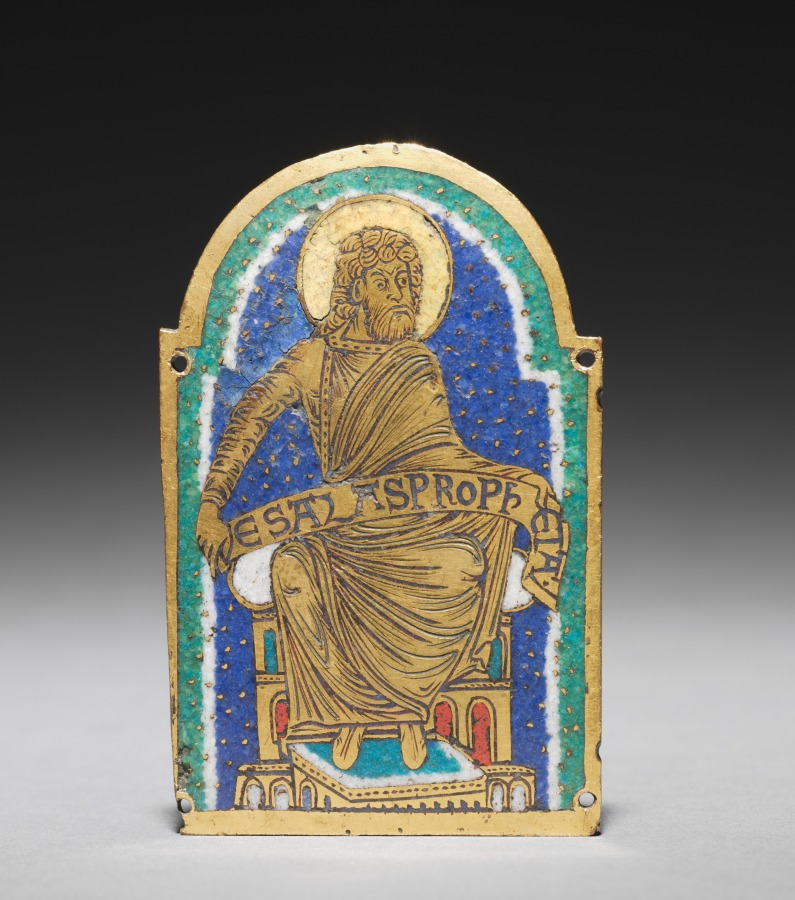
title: Plaque: Seated Prophet from a Reliquary Shrine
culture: Germany, Lower Saxony, Hildesheim, Romanesque period, 12th century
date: c. 1170–80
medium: gilded copper, champlevé enamel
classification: Enamel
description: Once used as decorations for a reliquary shrine, each enamel plaque represents a biblical prophet: Isaiah, Obadiah, Elisha, and Hosea. Fine gold dots punctuate dark blue backgrounds. Typical of Hildesheim enamels, this detailing creates the illusion that the prophets sit against star-studded twilight skies.